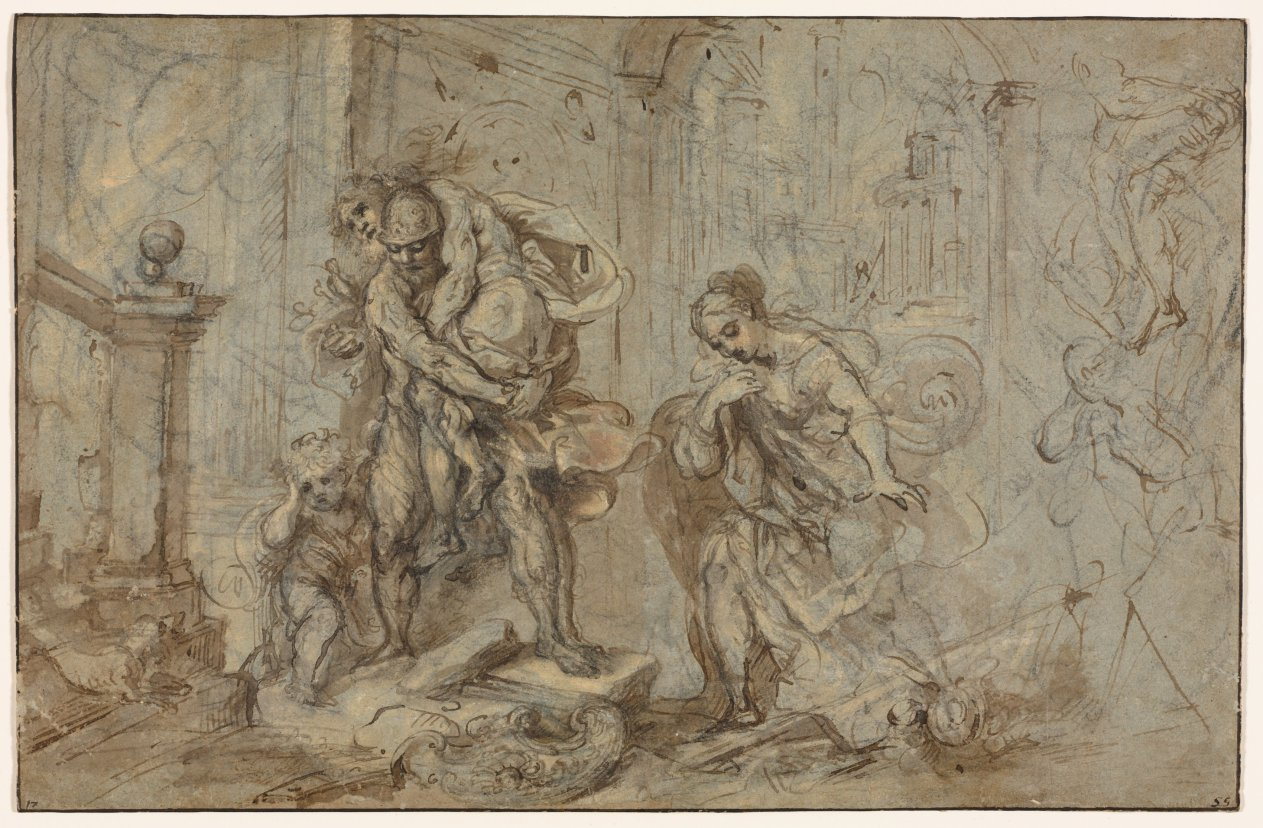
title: Aeneas Saving Anchises at the Fall of Troy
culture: Italy, 16th century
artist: Federico Barocci (Italian, 1528–1612)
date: 1587–88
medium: Pen and brown ink, brush and brown wash and yellow gouache heightened with traces of white, over black chalk, with stylus (banister); framing lines in pen and brown ink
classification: Drawing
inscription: lower left, in brown ink: 17 ; lower right, in brown ink: [illegible] ; lower right, in brown ink: 55 ; VERSO OF SECONDARY SUPPORT, center, in brown ink: Intagliato da Agostino Caracci. Il quadro è in Casa Borghese . [sideways] ; upper right, in graphite: 2767 [circled]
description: In book two of Virgil's epic poem The Aeneid (29-19 BC), the Trojan hero Aeneas escapes from the burning city of Troy and its Greek invaders with his family. Here the artist shows them making their way through a classical corridor. Aeneas carries his elderly father, Anchises, entrusted with holding their household gods. Aeneas holds the hand of his son, Ascanius, and his wife Creusa follows behind. Creusa's separation from the group alludes to her fate: she will fall behind and not survive their flight. Quick sketches on the right border of the sheet show Barocci practicing the balancing pose of Aeneas as he carries his father, and the stance of Creusa. The drawing relates to a now lost painting by Barocci and was also made into an engraving by Agostino Carracci (see CMA 1963.456). Details in the drawing such as the dog bounding down the stairs and Creusa's flowing hair and head scarf do not appear in the engraving.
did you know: This drawing may have been once owned by the painter Peter Paul Rubens (1577–1640).